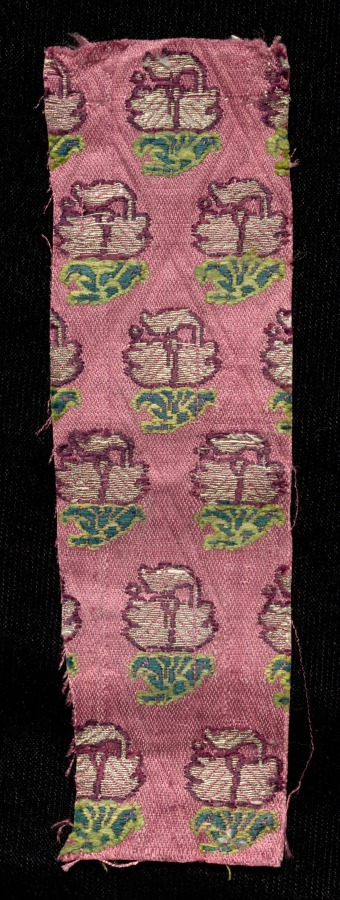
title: Fragment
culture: India, 19th century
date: 1800s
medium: brocade; sateen ground with silk and metal thread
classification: Textile